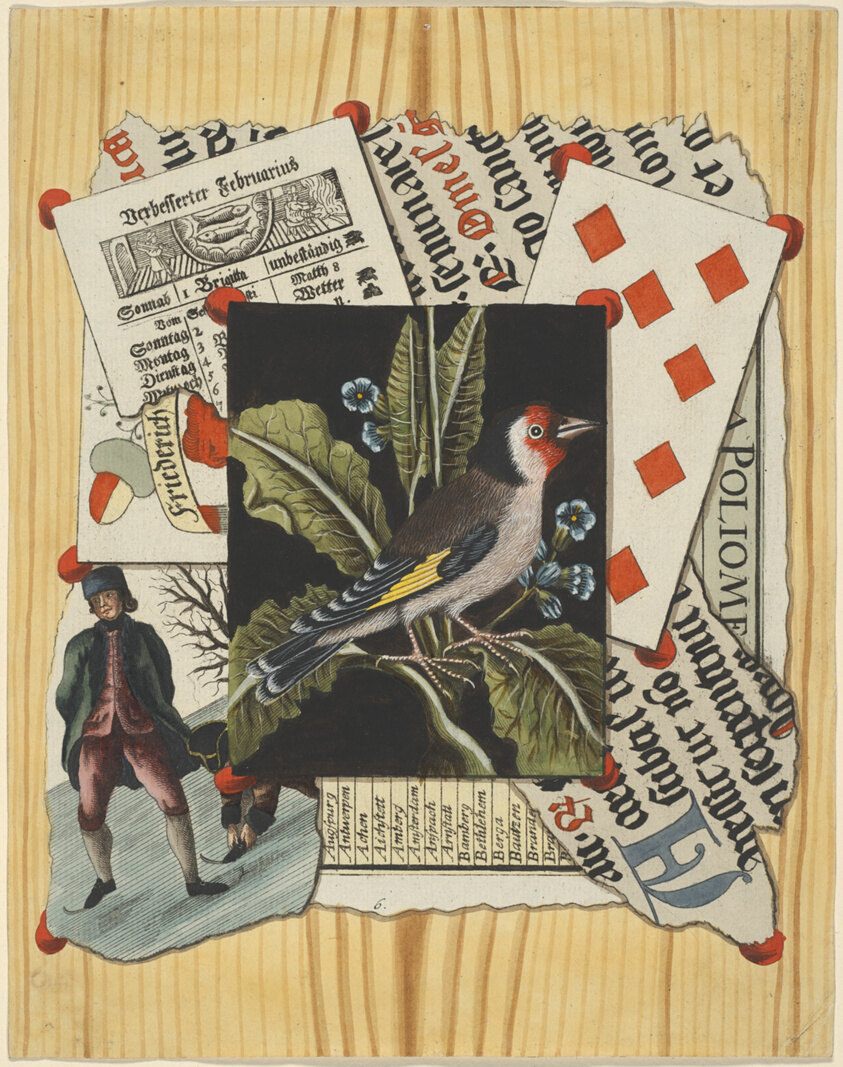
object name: Print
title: Quodlibet with Goldfinch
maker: Christian Gottlob Winterschmidt (German, 1755-c. 1809)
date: late 18th century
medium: Etching in black hand-colored with brush and watercolor on ivory laid paper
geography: Germany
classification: etching; print; prints and drawing